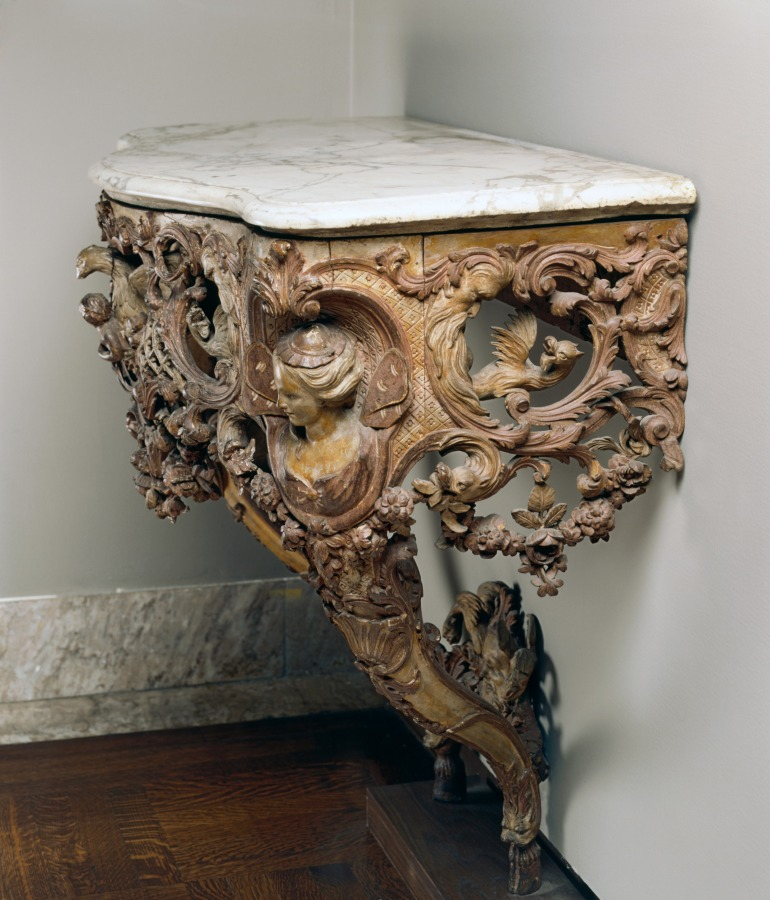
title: Console Table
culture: France, 18th century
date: c. 1720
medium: carved and painted wood, marble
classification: Furniture and woodwork